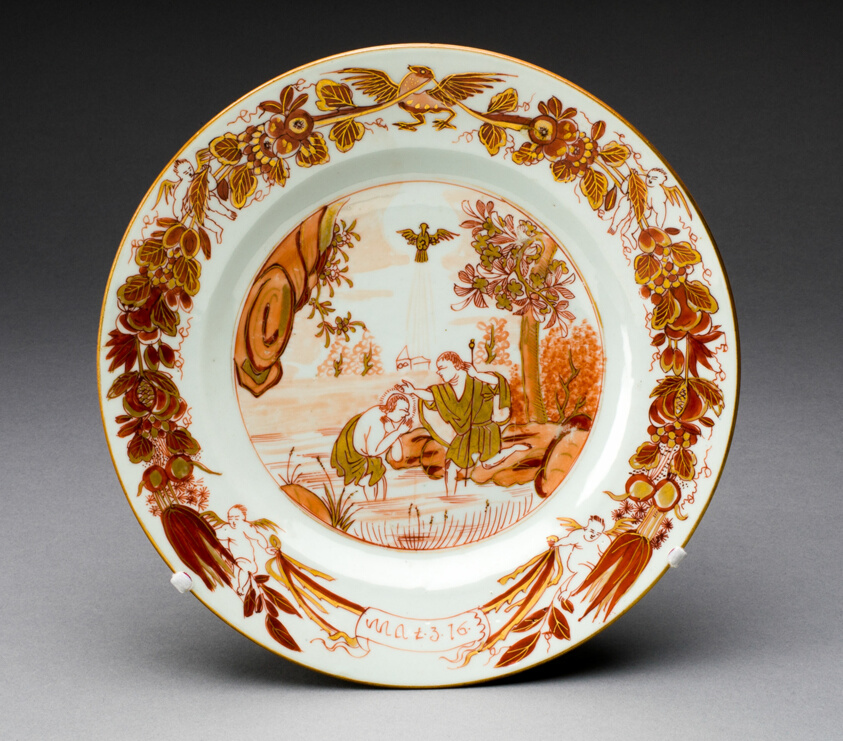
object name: Ceramics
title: Plate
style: chinese export, Chinese (culture or style), East Asian, asian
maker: China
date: c. 1750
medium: Hard-paste porcelain with iron red enamels and gilding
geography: Jingdezhen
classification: plate (general, dish); dish (vessel); chinese export porcelain; porcelain; european decorative arts; ceramics